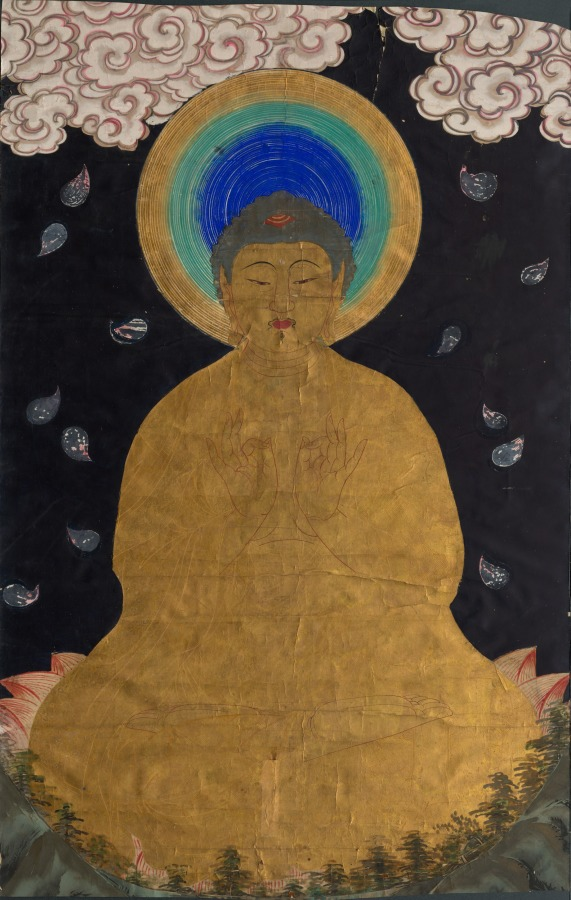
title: Buddha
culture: China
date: early 1900s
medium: Hanging scroll; color on silk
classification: Painting